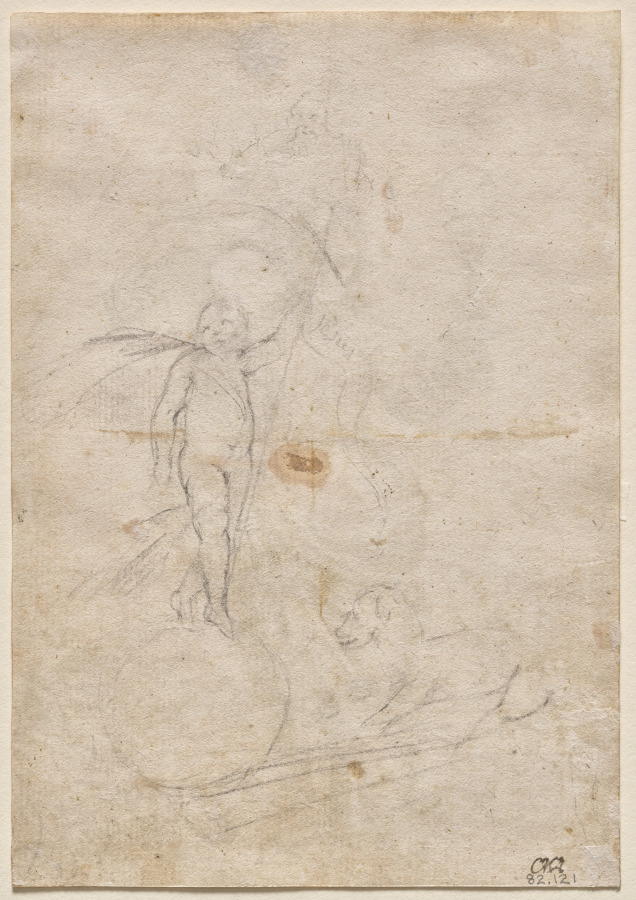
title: Resurrected Christ and Lamb of God (verso)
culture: Spain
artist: Alonso Cano (Spanish, 1601–1667)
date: 1666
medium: pen and brown ink and brush and brown wash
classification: Drawing